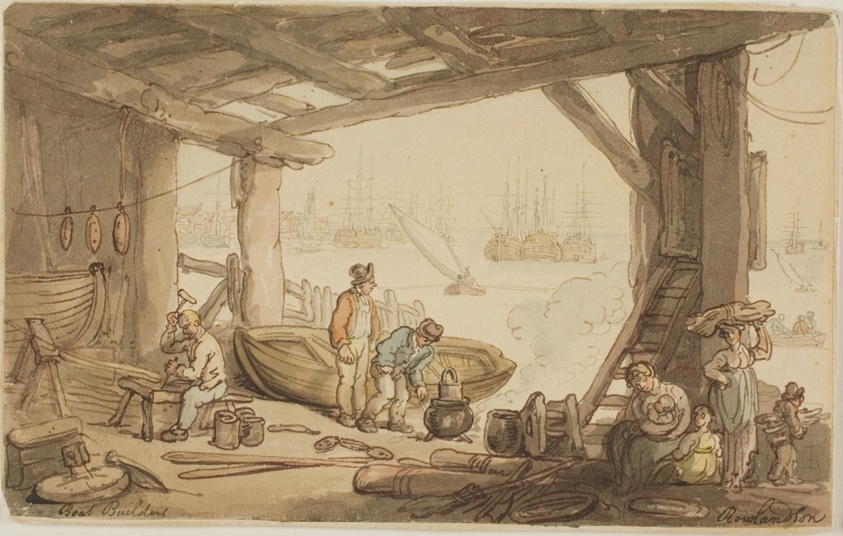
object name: Drawing and Watercolor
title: Boat Builders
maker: Thomas Rowlandson (English, 1756-1827)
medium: Pen and brown ink with brush and watercolor, over traces of graphite, on cream wove paper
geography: England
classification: watercolor; drawings (visual works); prints and drawing